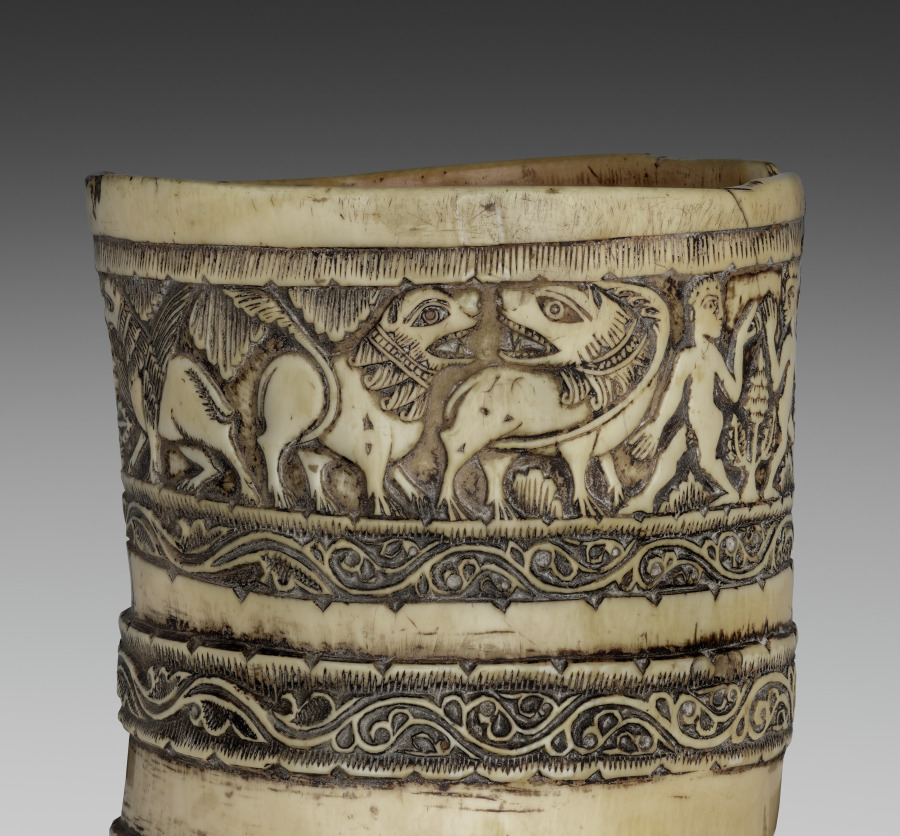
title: The So-called Horn of Saint Blaise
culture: South Italy or Sicily, 12th century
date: 1100–1200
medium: ivory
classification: Ivory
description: This oliphant--a carved elephant tusk in the shape of a hunting horn--was likely carved in an Arab ivory workshop in South Italy or Sicily. It is masterfully shaped, with a series of six carved bands, the outer ring depicting scenes from a hunt. The earliest surviving inventory of the church of Saint Blaise from 1482-85 lists an oliphant decorated with silver rings and precious stones and known as the "Horn of Saint Blaise." By the 17th century, Saint Blaise was reputed to have used this very horn to summon the faithful to worship.